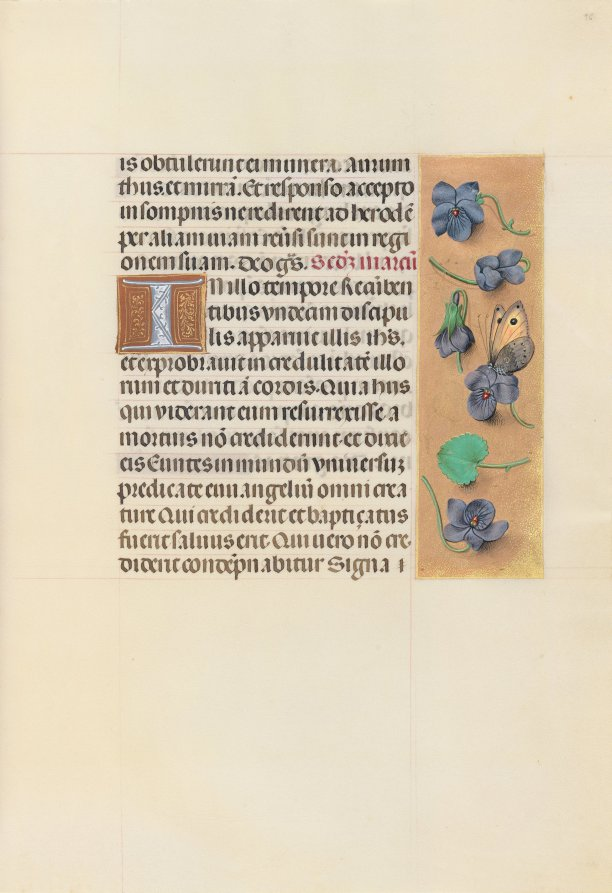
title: Hours of Queen Isabella the Catholic, Queen of Spain: Fol. 96r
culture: Flanders, Ghent and Bruges, late 15th century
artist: Master of the First Prayerbook of Maximillian (Flemish, c. 1444–1519)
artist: and Associates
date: c. 1500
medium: ink, tempera, and gold on vellum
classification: Bound Volume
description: This manuscript was illuminated by a circle of at least five highly organized manuscript painters active in the Flemish cities of Ghent and Bruges. The principal illuminator was Alexander Bening, who painted the majority of the book's miniatures. Manuscripts produced by this circle of artists are renowned for the decoration of their borders, which typically feature a rich variety of realistically-painted flowers, birds, and butterflies. This prayer book, called a book of hours, was intended not for a cleric, but for the private devotions of a lay person-in this case, Isabella the Catholic, Queen of Spain (1451-1504). Isabella's coat of arms embellishes the book's frontispiece. It is unlikely that the book was commissioned by the Queen herself; rather, she probably received it as a diplomatic gift from someone courting her patronage, perhaps Cardinal Francisco Jimenez de Cisneros. A Franciscan friar, Jimenez was dependent upon Isabella for his advancement, first to the post of Queen's confessor in 1492, and then to Archbishop of Toledo in 1495.